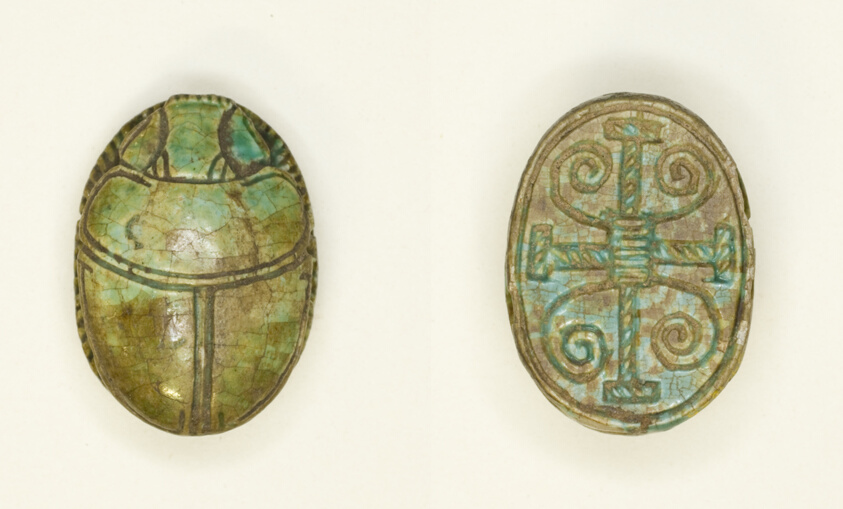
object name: Costume and Accessories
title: Scarab: Cross Pattern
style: second intermediate period, hyksos, fifteenth dynasty, ancient, egyptian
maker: Egyptian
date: Second Intermediate Period, Dynasty 15 (about 1650–1550 BCE)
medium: Glazed steatite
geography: Egypt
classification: scarab; ancient art; costume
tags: scarab beetle, scrolls (motifs)